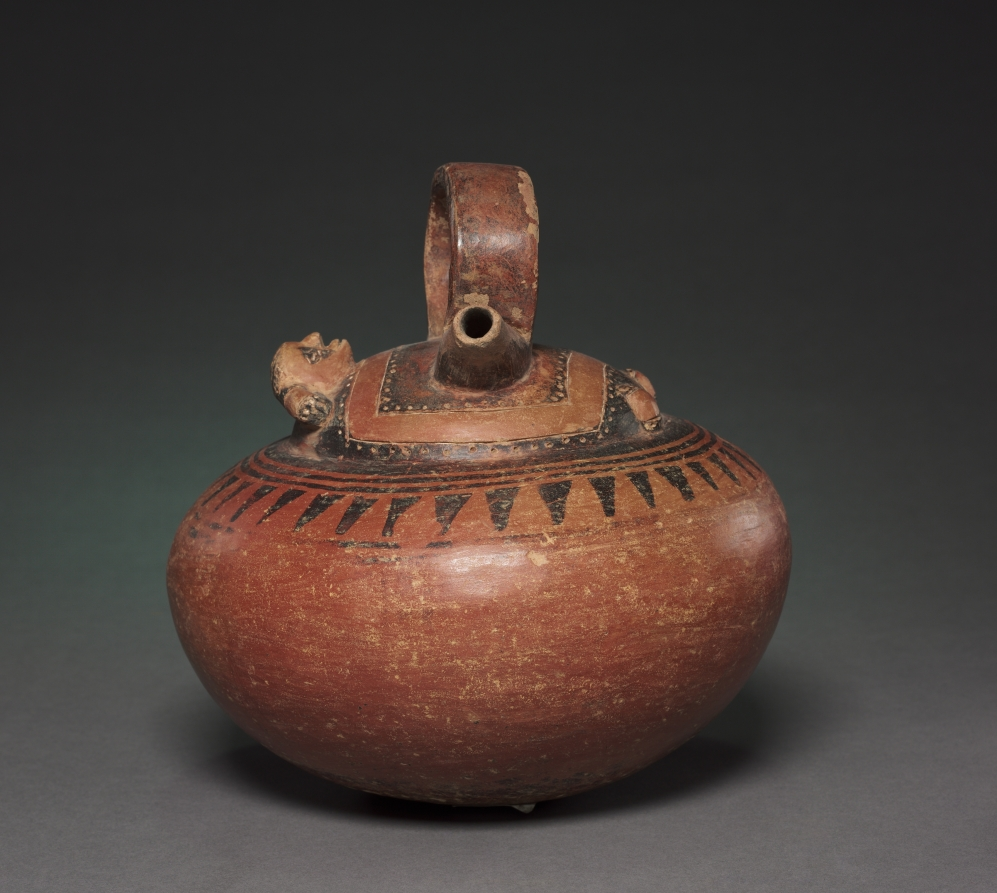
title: Double-Spouted Vessel with Reclining Figure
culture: Colombia, Calima region, Yotoco style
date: c. 1–800 CE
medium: ceramic, slip, resist paint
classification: Ceramic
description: This headdress ornament reveals a considerable flair for showmanship through its size and many suspended parts, which would have swayed and glittered with the wearer's motion. Like many other Yotoco ornaments, it features an enigmatic human face with closed eyes, a huge nose ornament that hides the lower face, and great disks that dangle from the ears.